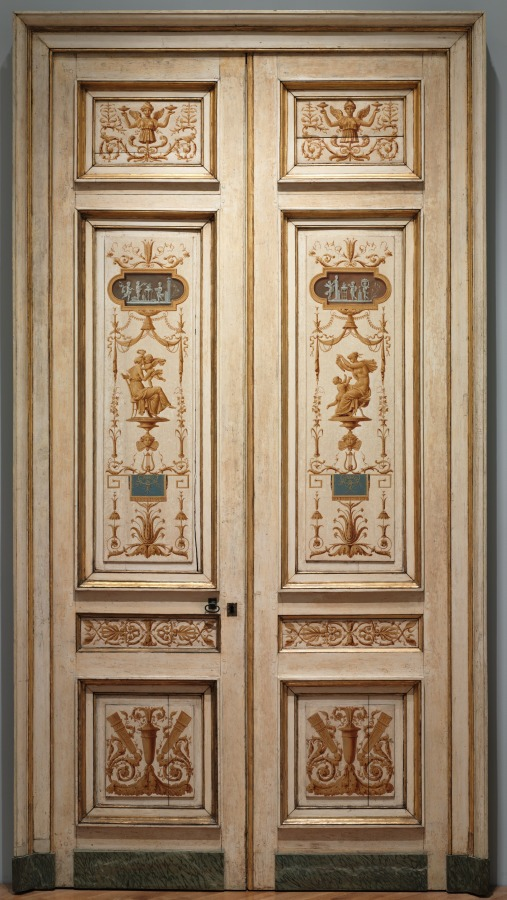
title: Double-Leaf Doors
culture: France, 18th century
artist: Pierre Rousseau (French, 1751–1829)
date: 1790s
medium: oil on wood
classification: Painting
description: Shifts in style and taste often result in changes to original architectural details. Rousseau painted these doors with imitation dark wood grain. Another craftsman later scraped off the dark color surrounding the classical designs. This set has recently been conserved.